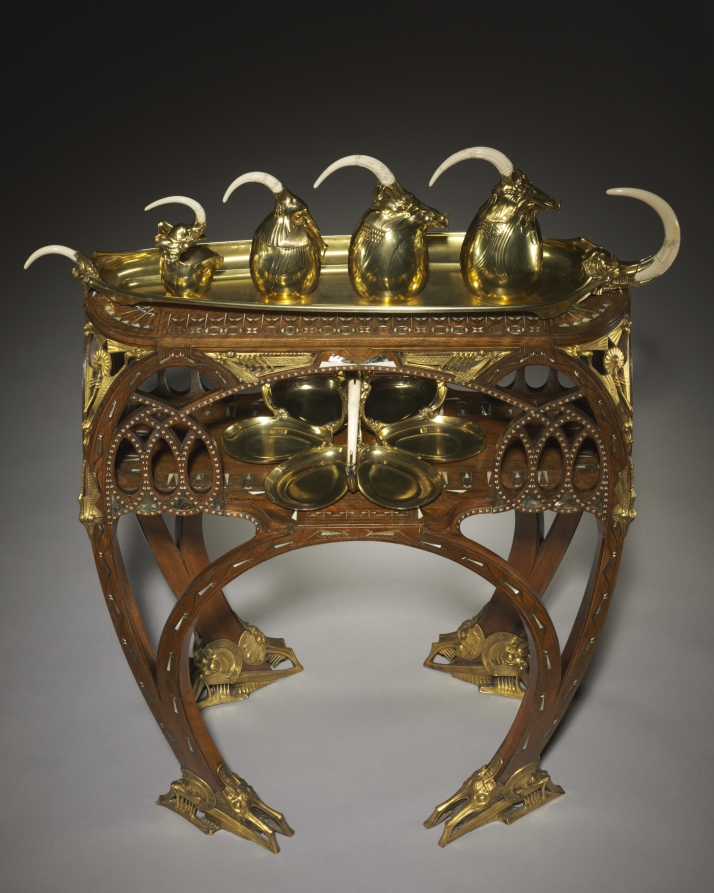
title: Salver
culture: France, Paris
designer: Carlo Bugatti (Italian, 1856–1940)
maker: Adrien-Aurélien Hebrard (French, 1866–1937)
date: c. 1907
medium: Gilt silver and ivory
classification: Silver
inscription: inscribed inside one of six ovoid compartments: "Bugatti" in ligature. Engraved on back: A.A. HEBRAND/ 8 RUE ROYAL/PARIS FRANCE.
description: This tea and coffee service, salver, and table, together with some now missing cups, were all designed by Carlo Bugatti as an ensemble and presented at the 1902 exposition devoted to decorative arts in Turin, Italy. The set was probably acquired from Bugatti's 1907 exhibition at the Galerie Hébrard in Paris by a wealthy South African widow, Anna Blake, who was living there at the time. Some of the animal and insect motifs suggest mythical beasts or the fossils of prehistoric animals. When Mrs. Blake returned to Cape Town, she took these and other pieces designed by Bugatti with her, and they remained in South Africa throughout her lifetime.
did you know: Carlo Bugatti's sons achieved illustrious careers of their own. Rembrandt Bugatti (1884-1916) became a celebrated sculptor, and Ettore Bugatti (1881-1947) manufactured luxurious automobiles and racing cars.